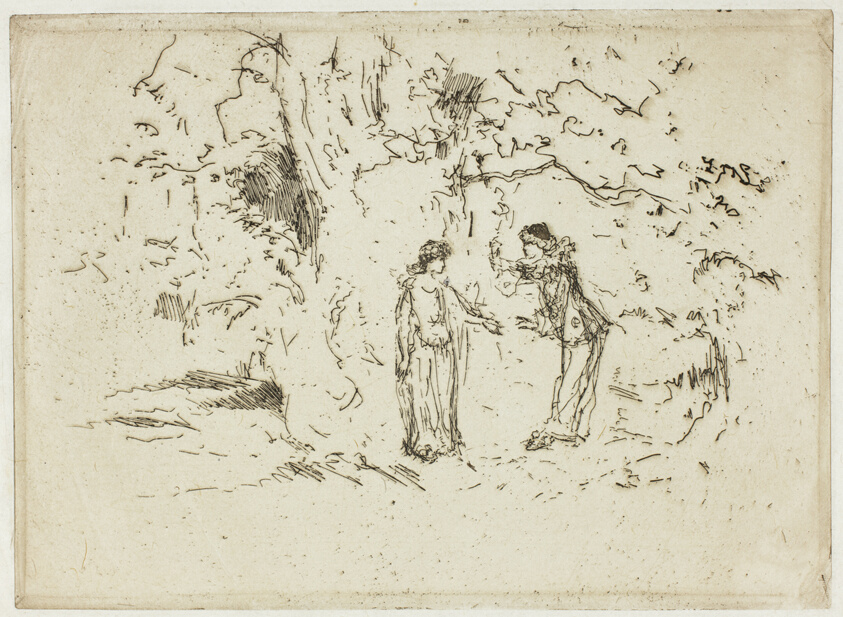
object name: Print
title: The Pastoral Play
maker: Theodore Roussel (French, worked in England, 1847-1926)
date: 1888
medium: Etching in brown, with plate tone, on off-white Japanese paper, pressed onto cream wove paper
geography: England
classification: etching; paper; print; prints and drawing